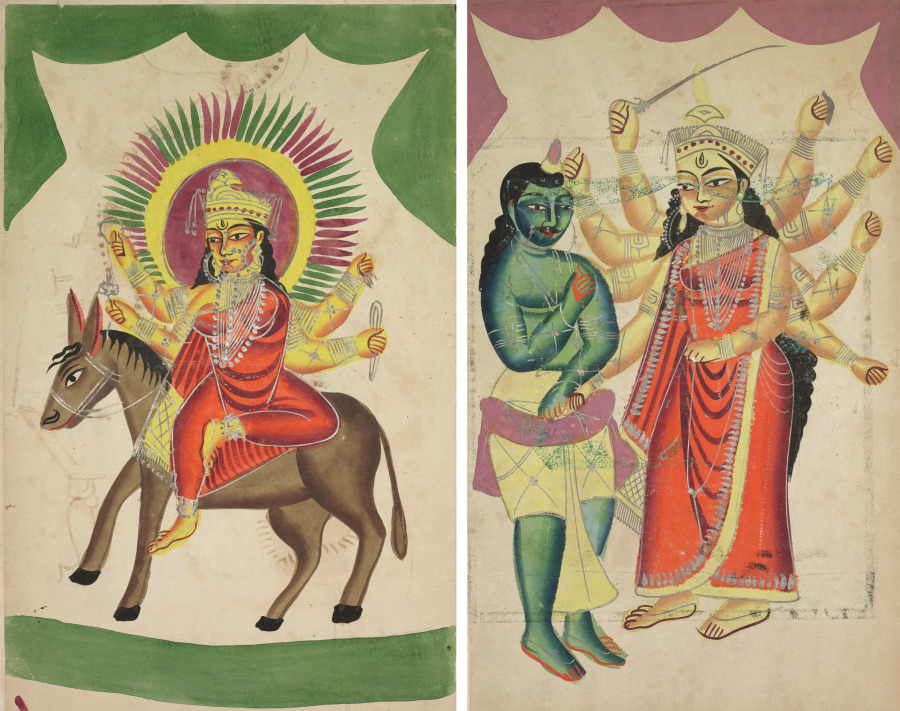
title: Leaf from a Kalighat album: Sheetaladevi: The Smallpox Goddess (recto); Durga (verso)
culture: Eastern India, Bengal, Kolkata, Kalighat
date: c. 1890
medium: Gum tempera, graphite, ink, and tin on paper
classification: Painting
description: Sheetala, the smallpox goddess, is simultaneously benevolent and dangerous: she can both protect and infect, bless and curse devotees with smallpox and other diseases. Persons scarred by smallpox are believed to have been graced by her. She is appeased so that she does not infect her worshippers. Her name, Sheetala, “Cool One,” refers to her birth out of a cooled sacrificial fire. The rippled curtains above her are suggestive of theatrical tableau and Sheetalapala (The Drama of Sheetala) that was performed in Bengal. She sits astride her vehicle (vahana), the donkey, regarded as an inauspicious animal.